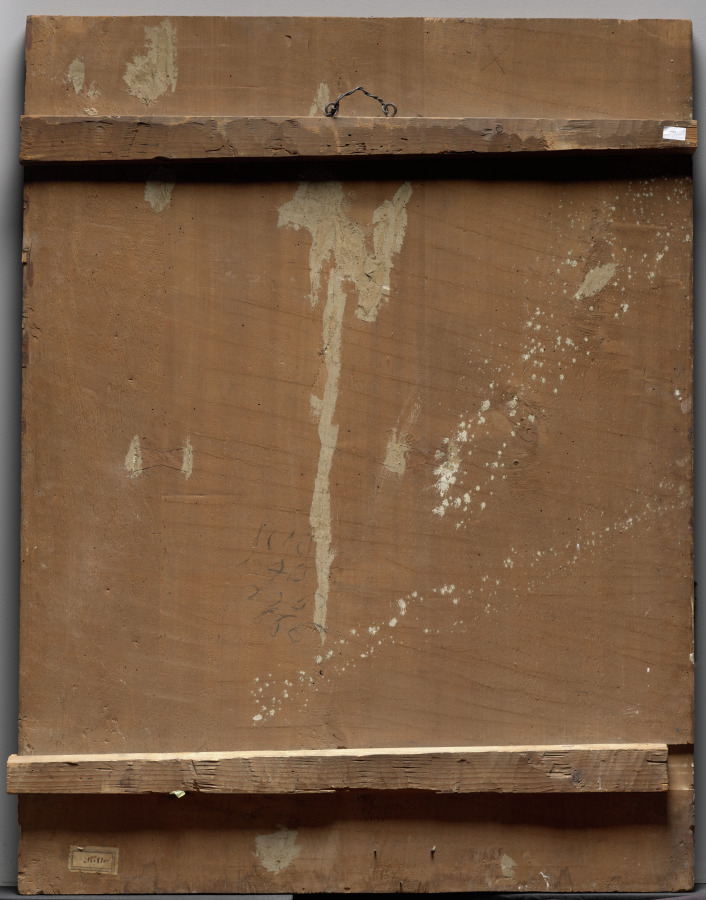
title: Holy Family with the Mystic Marriage of Saint Catherine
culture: Italy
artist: Tommaso d’Antonio Manzuoli, called Maso da San Friano (Italian, 1531–1571)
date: c. 1560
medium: oil on panel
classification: Painting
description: The marriage shown in this painting is called “mystic” because it was a purely symbolic. The infant Jesus places a ring on the finger of Catherine of Alexandria, a fourth-century saint who had a vision of dedicating herself to God and remaining a virgin instead of marrying. Note the otherworldly quality of the women and children’s elegant faces, compared to the naturalism of elderly Saint Joseph, who may be a likeness of someone the artist knew.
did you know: Saint Catherine is usually shown with a spiked wheel; here, it is barely visible below her hand.